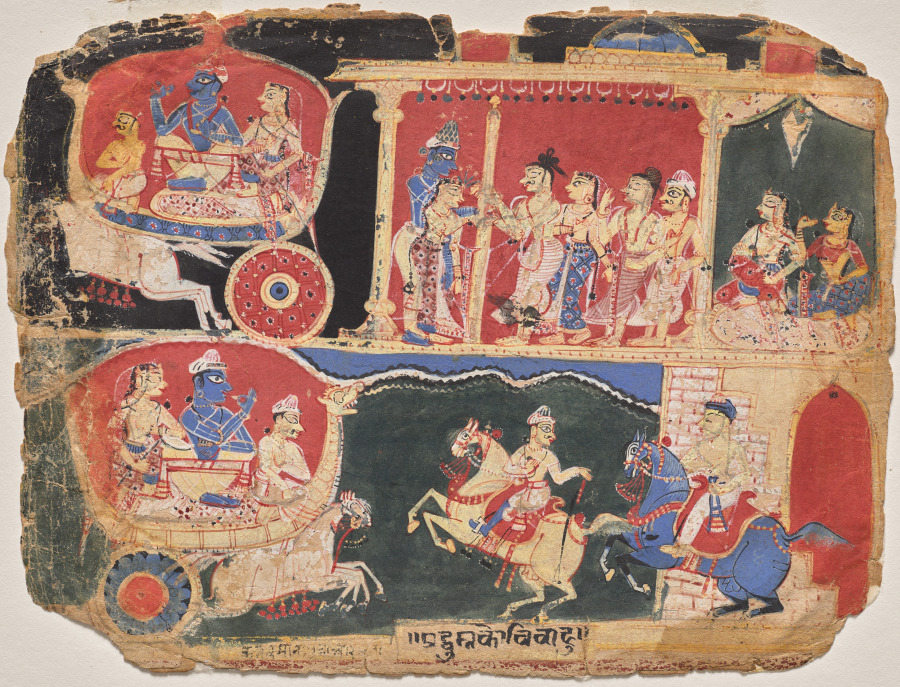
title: The Marriage of Pradyumna and Rukmavati, page from a Bhagavata Purana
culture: Northern India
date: c. 1525–40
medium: Gum tempera and ink on paper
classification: Painting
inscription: [[recto, lower margin, beside illegible smaller script]] pradyumna ko vivahu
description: Like his father Krishna, Pradyumna appears blue in color. He is shown three times in this painting with his bride. The scene of his marriage is in the upper level where a Brahmin, a Hindu priest, to the right of the pole and wearing a white lower garment and looped topknot of hair, performs the ceremony. Their arrival at the ceremony is pictured below. The flattened spaces and bold variety of background colors are typical of a major strain of Indian paintings made before the time of the Mughal emperor Akbar, who encouraged stylistic changes derived from exposure to Persian and European art forms.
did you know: Pradyumna was the son of Krishna and an incarnation of the god of love.